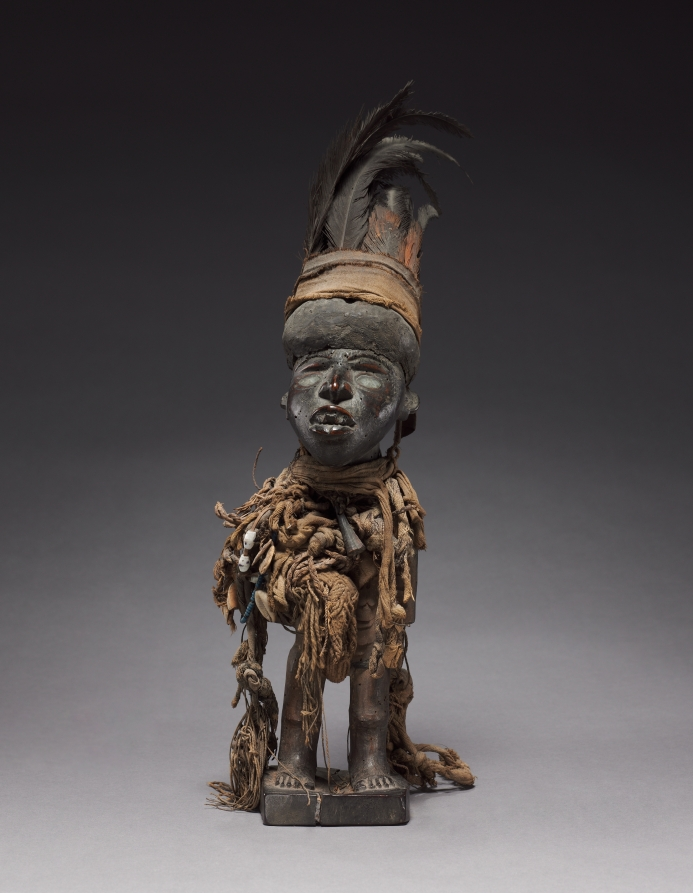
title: Male Figure (Nkisi)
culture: Africa, Central Africa, Democratic Republic of Congo, Cabinda, or Republic of the Congo, probably Vili-style maker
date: late 1800s-early 1900s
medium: Wood, cloth, resin, organic material, feathers, natural fibers, antelope horn, seashells (including cowrie shells), glass beads, metalized glass, and plant fiber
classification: Sculpture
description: Nkisi is an object that is believed to host an ancestral spirit. Unusual among these figures, this nkisi figure is missing its nduda, “night guns.” These guns would be filled with gunpowder functioning as defense against witches or misfortune. Unless its guns were lost during the course of its life history, this nkisi may instead be an example of a more general type called mpanzu, whose functions included protection.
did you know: Different from other figures functioning as defense against witches or misfortune, its “night guns,” or nduda, are missing.